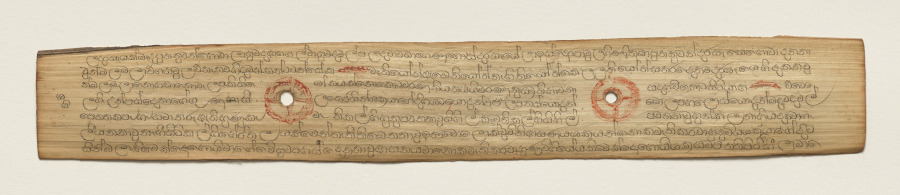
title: Leaf from a Buddhist Manuscript (recto)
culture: Sri Lanka, Singhalese, Late 17th century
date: c. 1700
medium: fiber paper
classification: Manuscript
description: Palm leaf material is still used for manuscripts in Sri Lanka. The palm leaves are prepared first by boiling them, drying them in the sun, and then rubbing them with oils. Scribes then use a metal stylus to incise the text. Then charcoal powder is wiped across the pages, filling in only the inscribed lines.